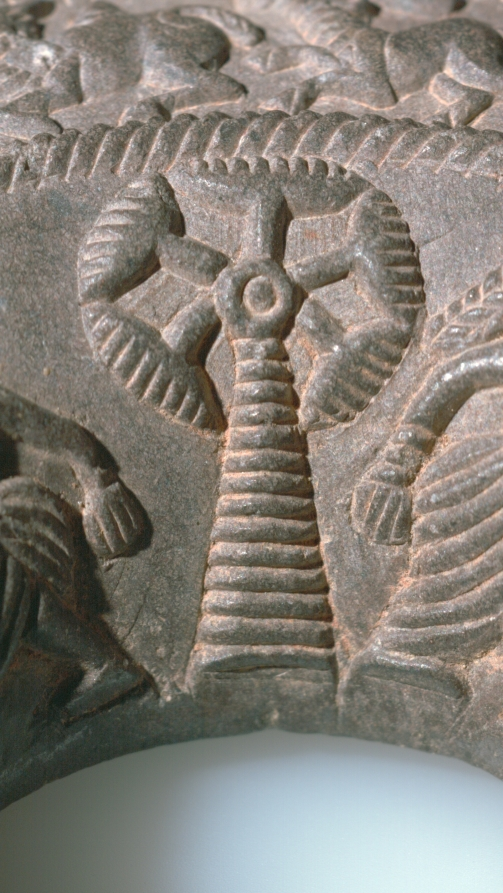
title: Ringstone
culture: India, Maurya period (322–185 BCE)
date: 200s BCE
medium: steatite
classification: Sculpture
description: Ringstones are among the earliest works of art to be created in stone during India's historical period. This example is finely carved with detailed images of affectionate couples and palm trees, running animals, and geometric motifs in concentric circles. The function of ringstones remains uncertain, since none of the surviving examples is inscribed or explained in a text.